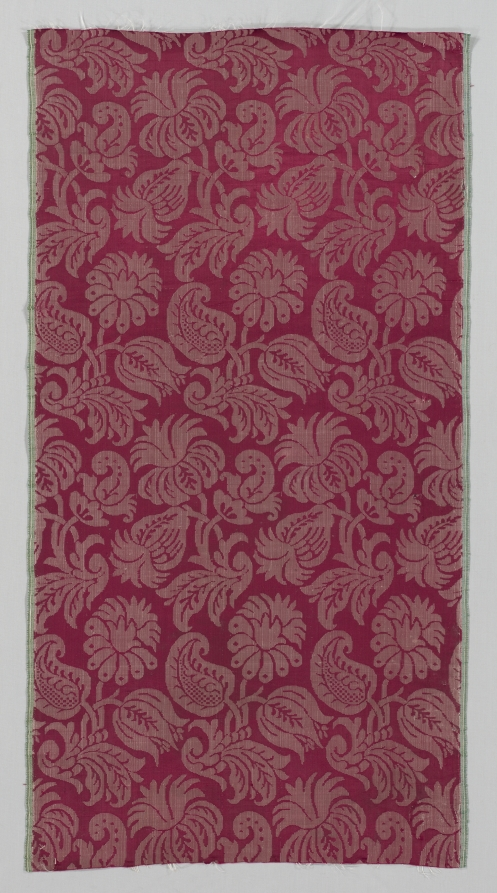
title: Length of Silk Textile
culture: Italy, 17th century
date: 1600s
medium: damask, silk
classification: Textile